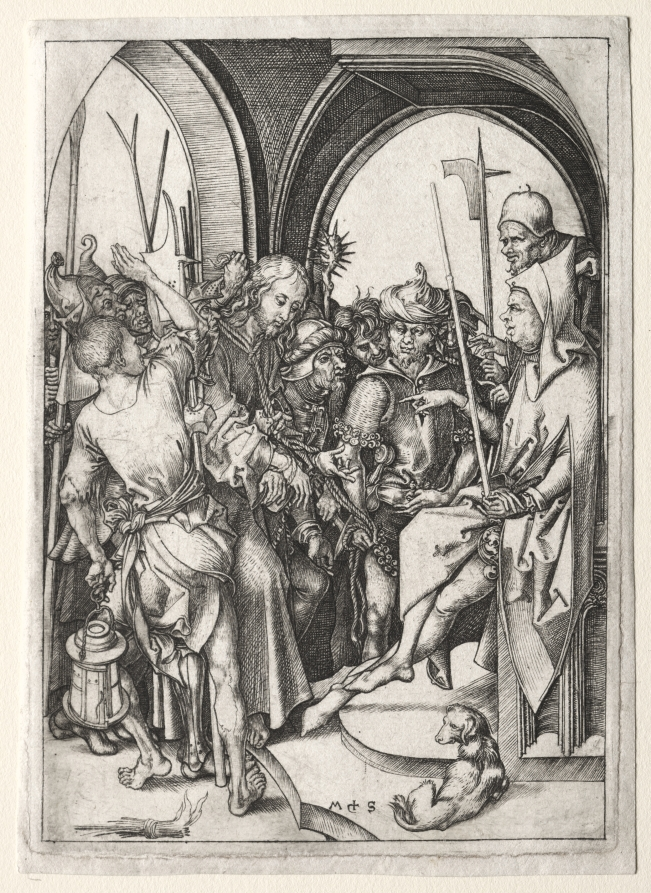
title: The Passion: Christ Before Annas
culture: Germany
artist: Martin Schongauer (German, c. 1450–1491)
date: c. 1480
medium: engraving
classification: Print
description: Martin Schongauer's series of the Passion of Christ was his largest set of engravings, made around 1480, and extensively copied across Europe. It consists of twelve prints detailing the suffering of Christ in the last days of his life. Schongauer's version focuses on crowded scenes, grotesque physiognomies of Christ's tormentors, and great pathos in the compositions. Here, Christ is led to the high priest Annas to be judged, prior to being brought before Pontius Pilate.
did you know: The dog in this scene likely refers to late medieval Passion literature, which often compared Christ's tormentors to dogs.